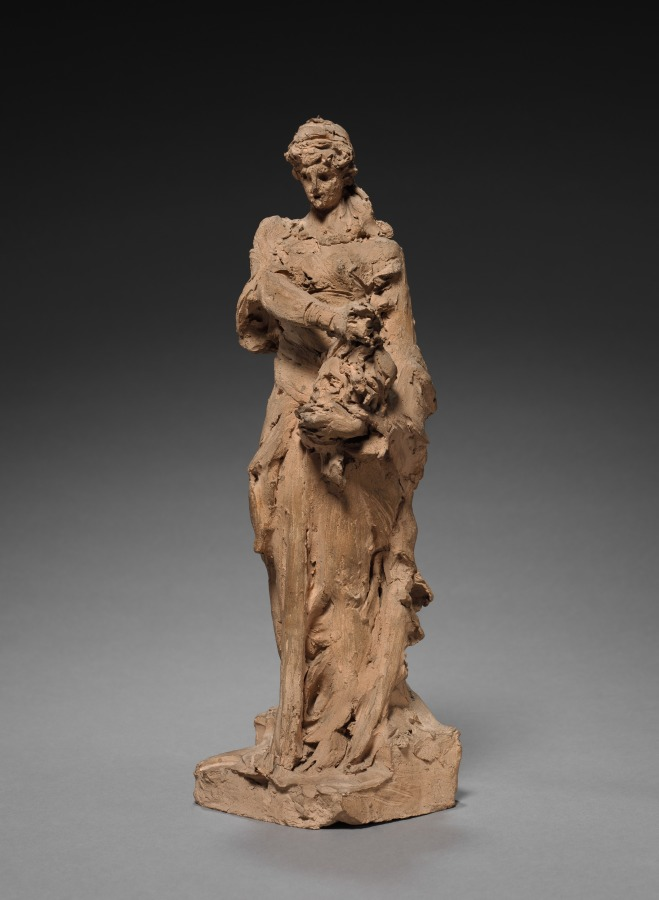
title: Judith with the Head of Holofernes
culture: France, 19th century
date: mid-1800s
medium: terracotta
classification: Sculpture